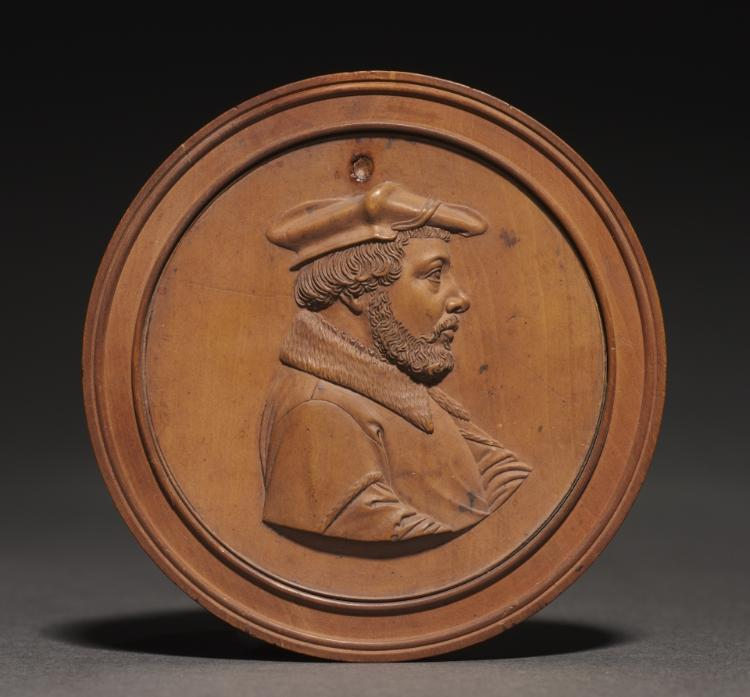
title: Portrait of a Man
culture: Germany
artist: Friedrich Hagenauer (German, 1490/1500–after 1546)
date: 1527–1546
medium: boxwood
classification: Sculpture